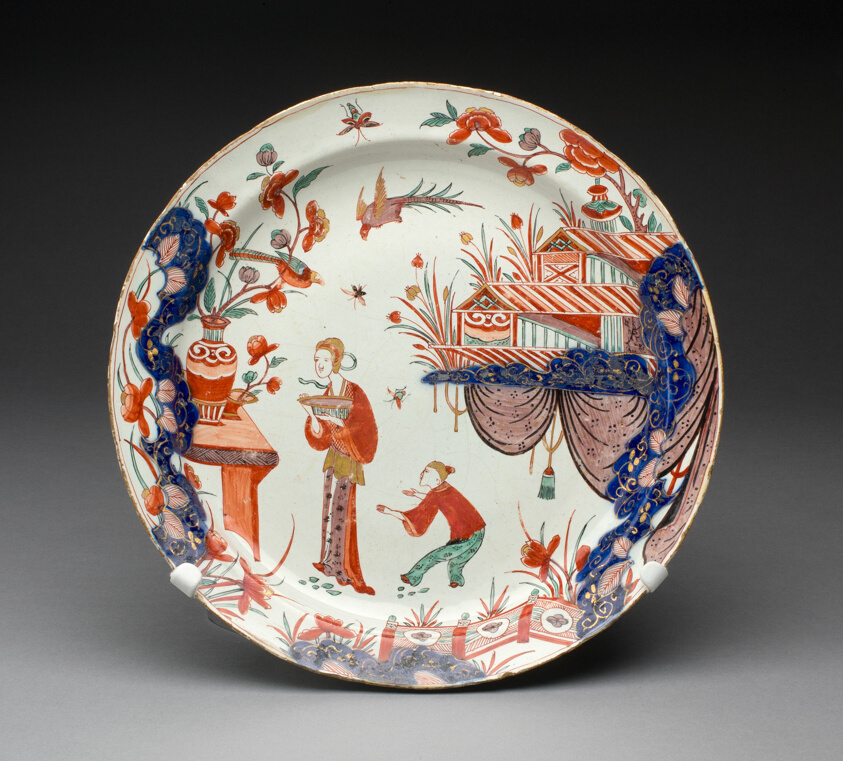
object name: Ceramics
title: Plate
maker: De Grieksche A (The Greek A) Factory; Delft, Netherlands, 1658-1811; Pieter Adriaensz. Kocks; Dutch, active 1701-1722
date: c. 1710-20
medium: Tin-glazed earthenware (Delftware)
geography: Delft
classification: plate (general, dish); dish (vessel); earthenware; ceramics; european decorative arts